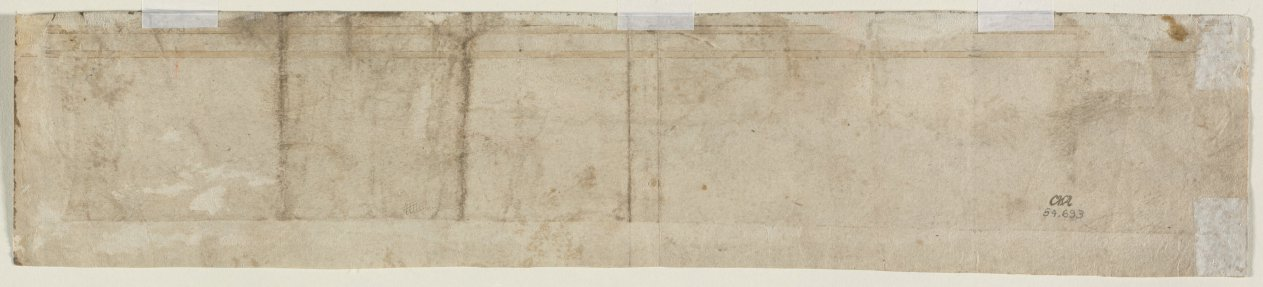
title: Partial Architectural Study (verso)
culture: Italy, 16th century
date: first half 1500s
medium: pen and brown ink and brush and brown wash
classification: Drawing